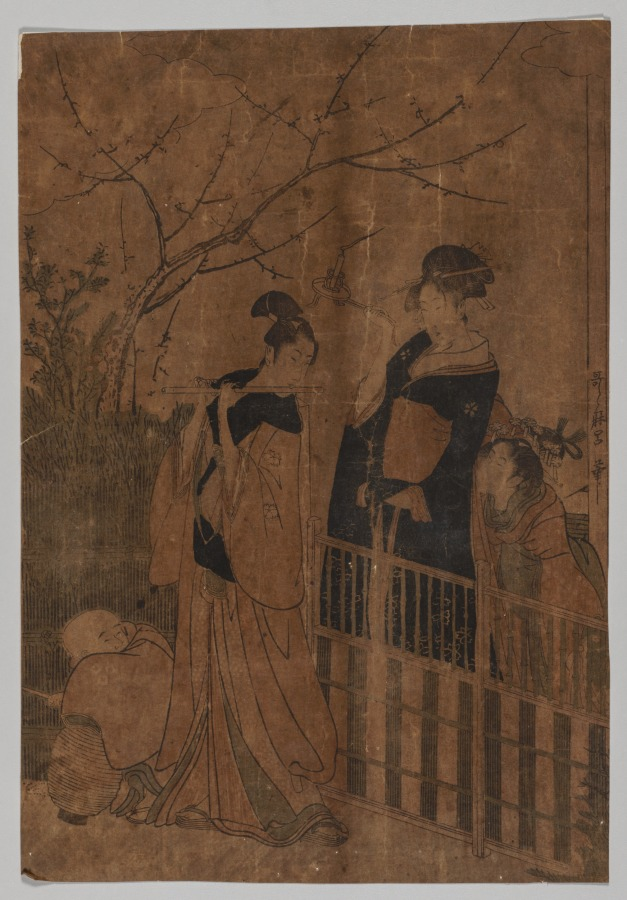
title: Serenade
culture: Japan, Edo period (1615–1868)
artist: Kitagawa Utamaro (Japanese, c. 1754–1806)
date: 1753–1806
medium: color woodblock print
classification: Print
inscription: Signature: Utamaro fude